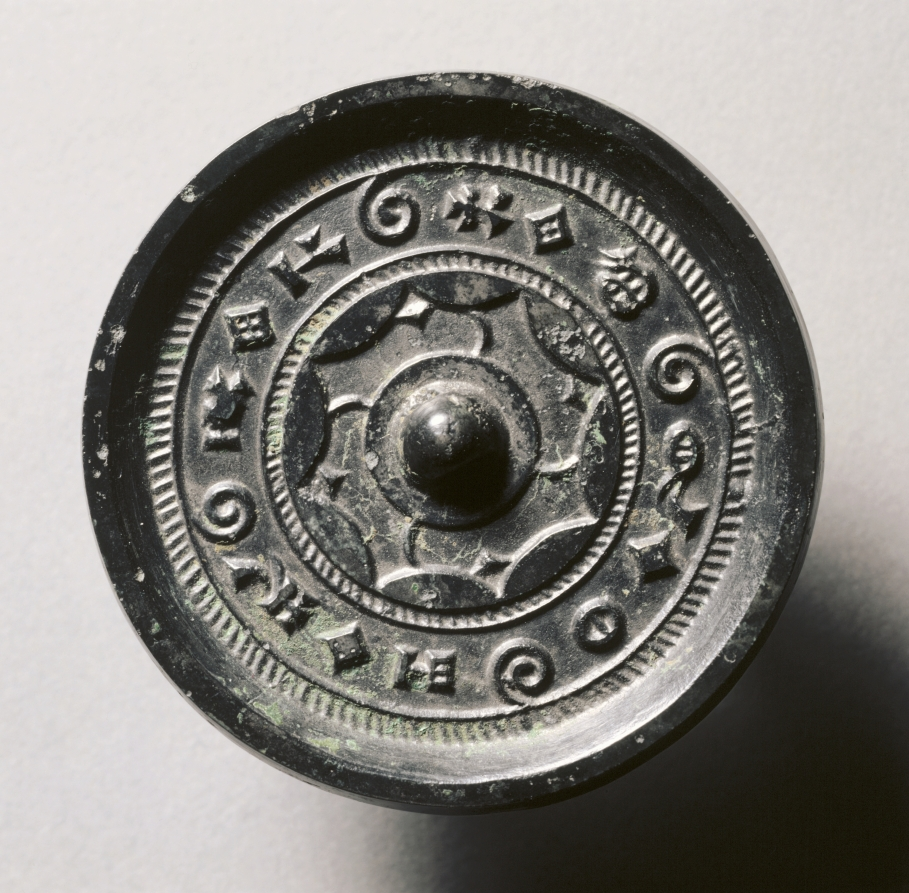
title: Mirror with Concentric Circles and Linked Arcs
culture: China, Western Han dynasty (206 BCE–8 CE)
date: late 300s BCE–50 CE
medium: bronze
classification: Metalwork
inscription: By the light of the sun, the world is made bright.